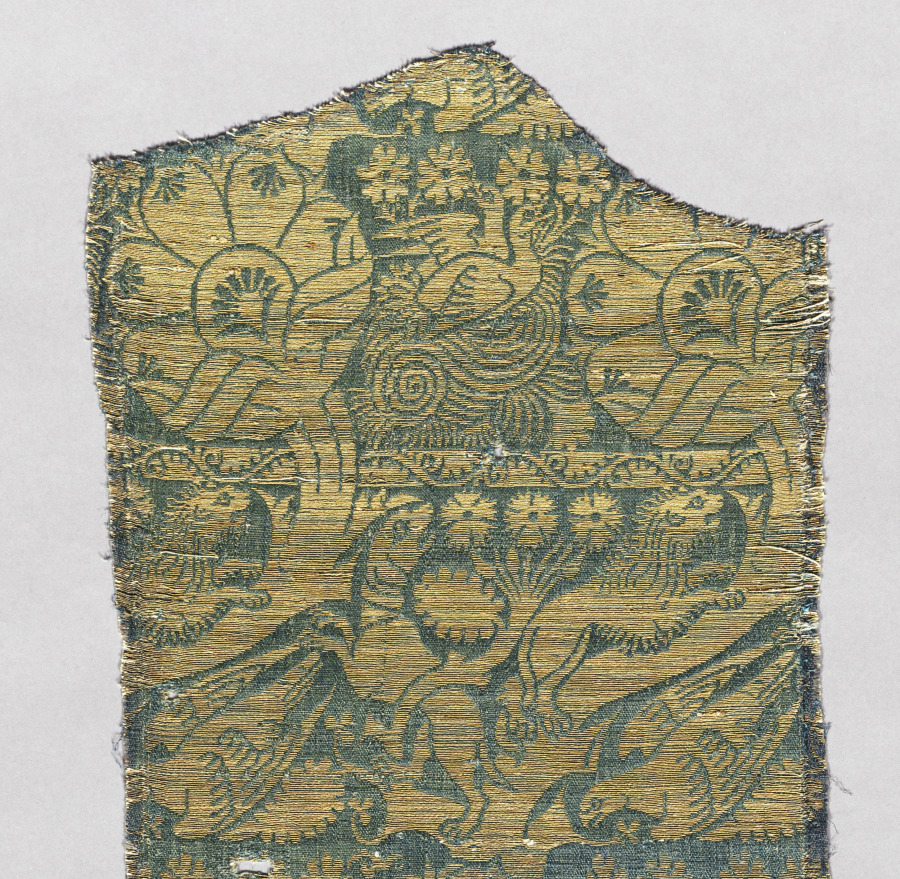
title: Chasuble Fragment with Realistic Animals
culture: Italy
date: c. 1420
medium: Silk, gold thread; lampas weave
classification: Textile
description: Around 1400 an emerging interest in the bucolic world of nature encouraged a new trend among textile designers, as seen in the lions, hawks, dogs, and ducks on this luxury silk fragment. The continual influence of Chinese asymmetry, however, is evident in the prominent undulating palmette trees, enlarged from sinuous vines frequently seen in Italian silks and velvets from this period.